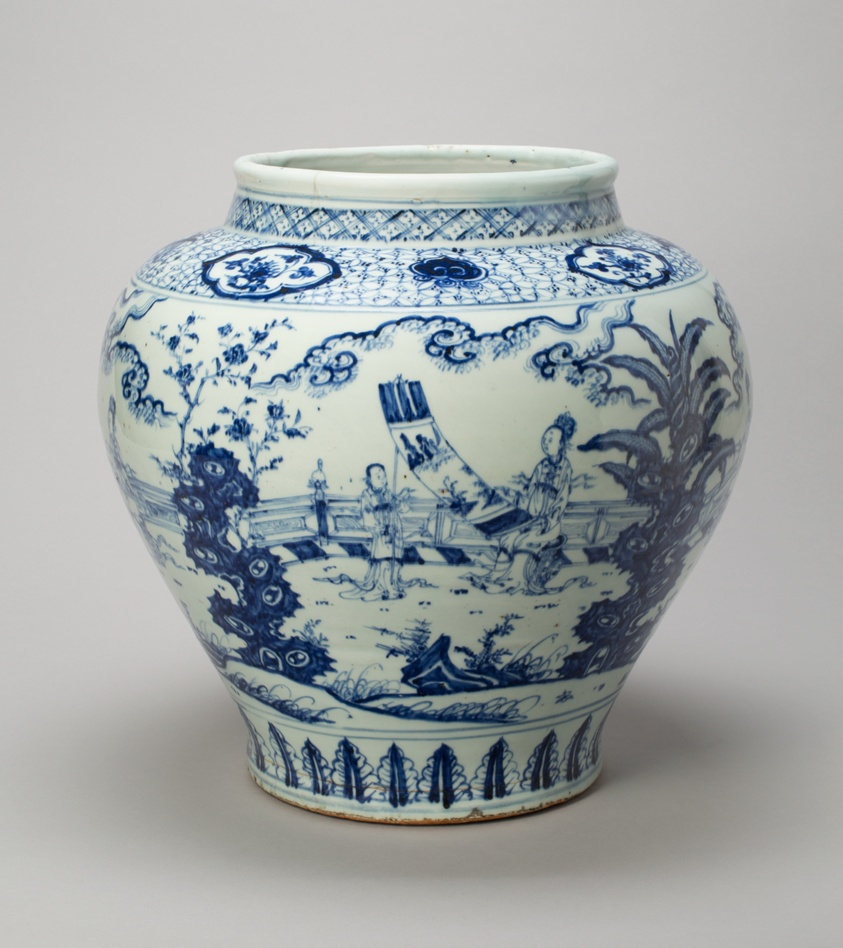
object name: Vessel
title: Jar with the Four Accomplishments: Painting, Calligraphy, Music, Strategy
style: Chinese (culture or style)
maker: China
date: Ming dynasty (1368–1644), 15th century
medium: Porcelain painted in underglaze blue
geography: China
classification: porcelain; asian art; ceramics; vessel